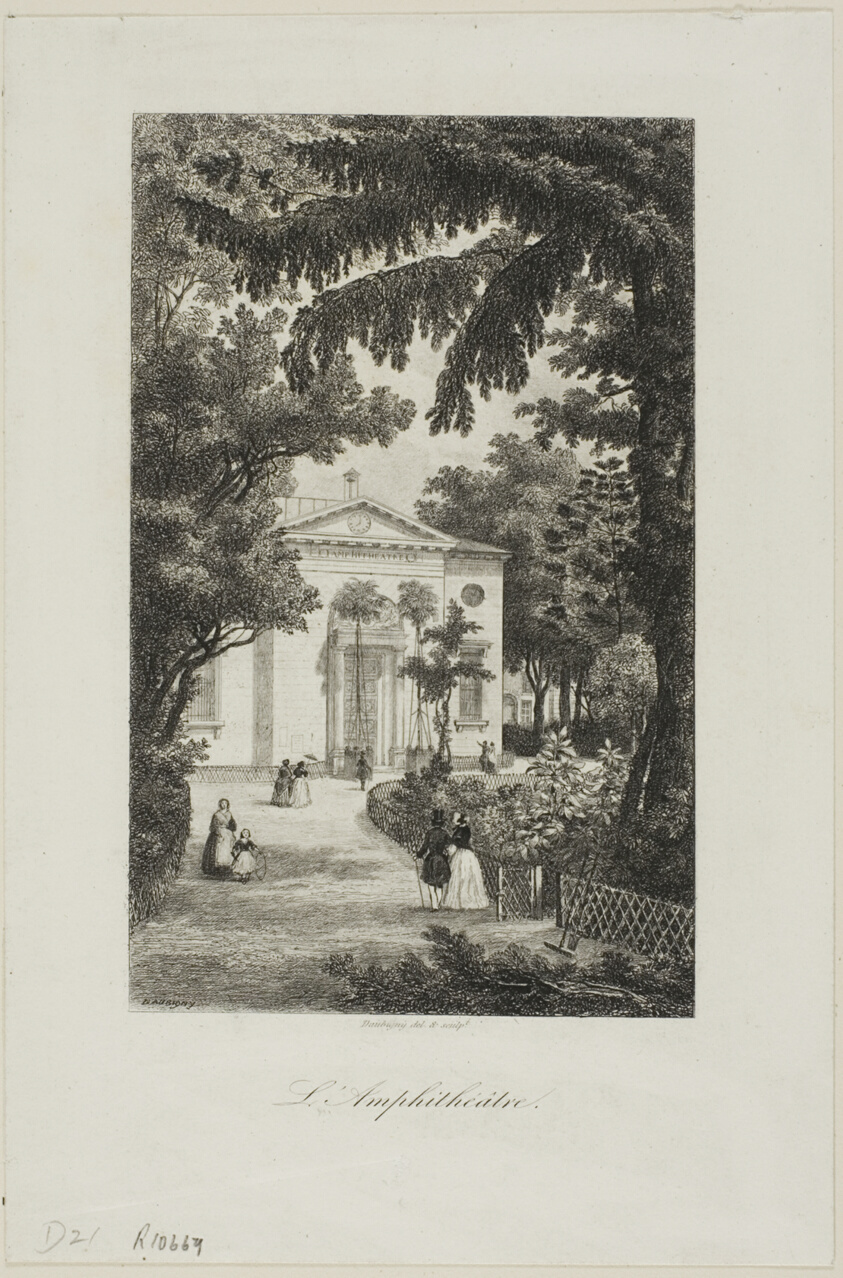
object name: Print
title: The Amphitheatre of the Jardin des Plantes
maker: Charles François Daubigny (French, 1817-1878)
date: 1842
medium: Etching on white wove paper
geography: France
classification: etching; print; prints and drawing